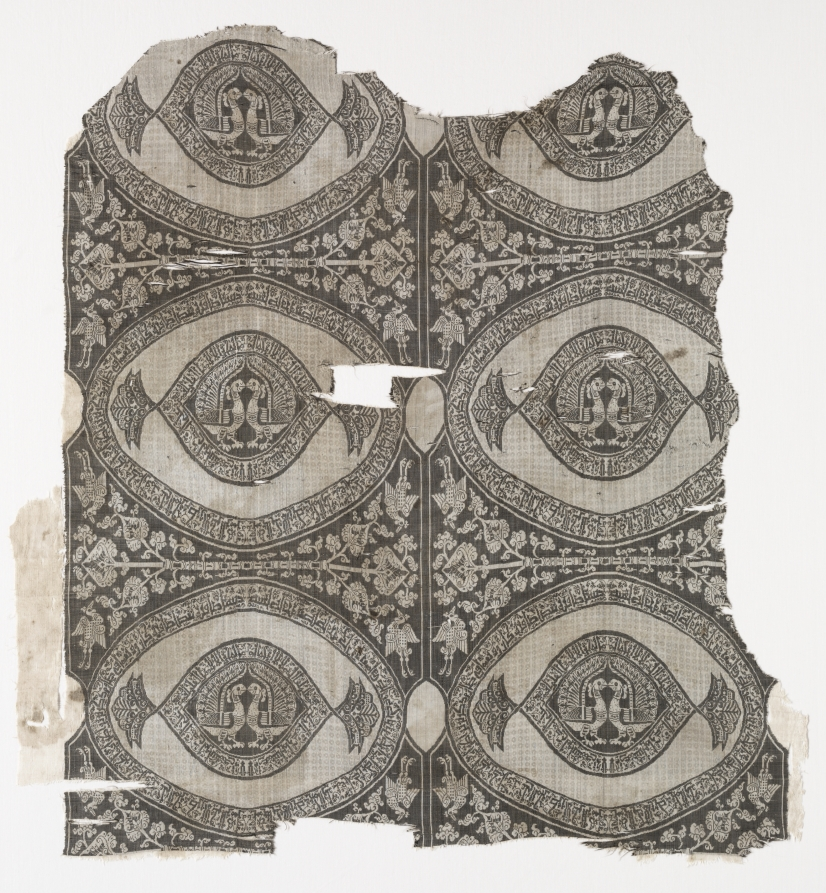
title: Medallions with confronting peacocks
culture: Iran ?, in the style of the Buyid period (945–1055)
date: 1660–1955 (radiocarbon date, 95% probability)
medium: Silk: lampas weave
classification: Textile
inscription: Inscription in border of oval, orthograde on the left and retrograde on the right, reads: hasha' dafiyah bayda' safiyah kan rawnaquha fi sarim dhakar; yuzayyin atrafaha turuz kama ruqimat 'alá al-majarrah turuq al-anjum alzuhr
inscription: Inscription on the inner medallion, orthograde on the left and retrograde on the right, reads: ma al-fakhr illa li-ahl al-'ilm innahum 'alá al-hudá li-man istahdá adilla'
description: This textile preserves six ovals aligned in two vertical columns; the top two ovals are fragmentary. Columns are separated by two guard lines that are interrupted by smaller vertical almond-shaped motifs; these are tangent to the large ovals at the widest point. Each large oval, bordered by a band of floriated Kufic, has a central ogival medallion, also bordered with floriated Kufic, with palmettes at each end. The medallions are placed on a ground of white on white with small aligned circles. Interspaces between large ovals are filled with pairs of opposed palmette trees flanked at each end with confronting birds in flight.